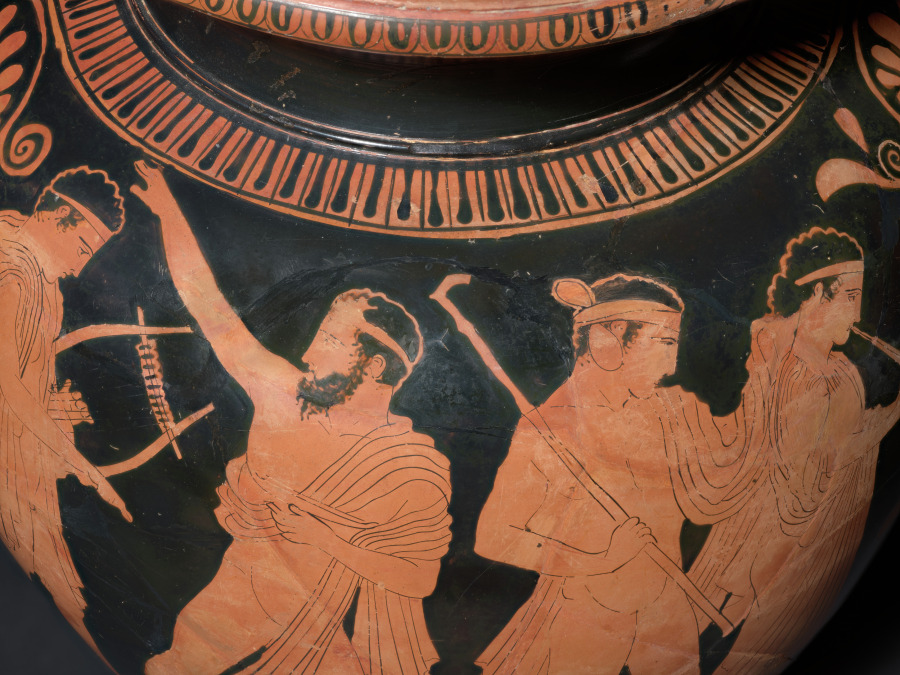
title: Red-Figure Stamnos (Mixing/Storage Vessel): Komos (Musicians and Revelers)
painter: attributed to Kleophon Painter (Greek, Attic, active c. 440–410 BCE)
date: c. 435–425 BCE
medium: Ceramic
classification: Ceramic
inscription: Κ Α Λ Ο Σ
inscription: Κ Α Λ Ο [Σ]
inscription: black '080'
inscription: black 'WF2'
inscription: black '0.19'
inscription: red '09.6'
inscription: partially removed red and white sticker, with number blacked out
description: Four lively figures move to the right across the front side of this stamnos, a vase used for storing and mixing wine. First comes a finely dressed woman playing the pipes, followed by three male figures, all nearly nude. The bearded one holds a drinking cup and reaches back, perhaps dancing, while the last in line concentrates on the music of his lyre.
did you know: The Athenian stamnos, a shape favored by the Etruscans, was made primarily for export.